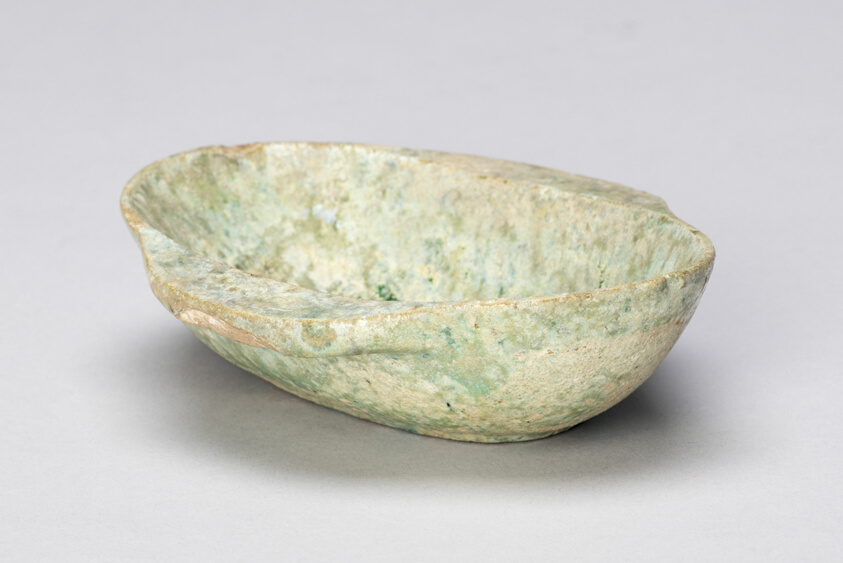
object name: Vessel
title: Ear Cup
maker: China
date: Han dynasty (206 B.C.–221 A.D.)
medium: Earthenware with lead green glaze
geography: China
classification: earthenware; asian art; ceramics; vessel